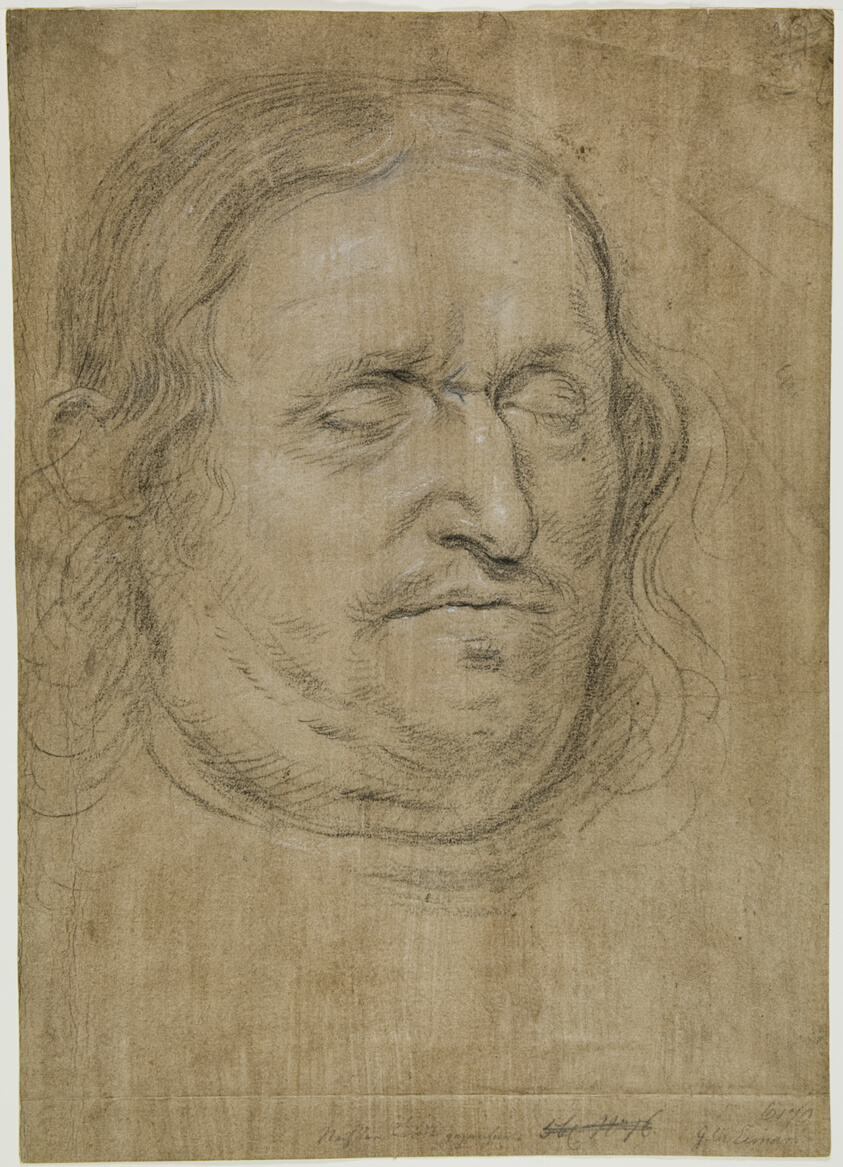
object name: Drawing and Watercolor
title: Death Mask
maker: Georg Christoph Eimmart, the Younger (Germany, 1638-1705)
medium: Black and white chalk on paper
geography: Germany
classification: chalk; drawings (visual works); prints and drawing